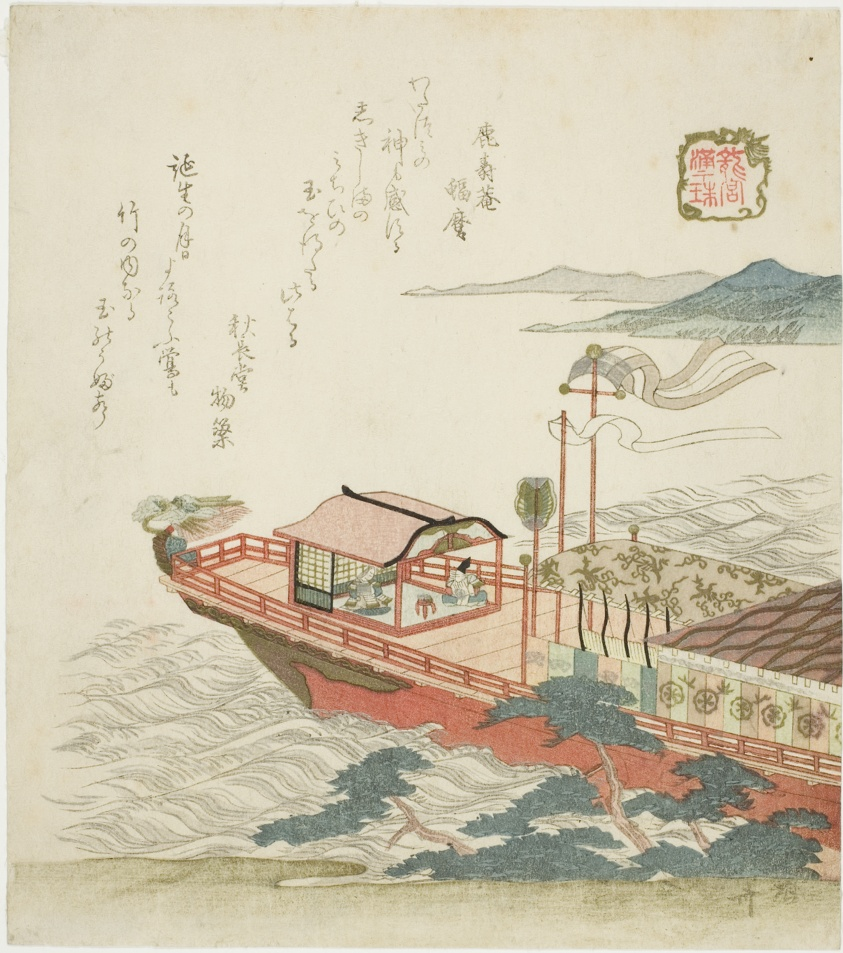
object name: Print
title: Jewel of the Full Tide (Manju), from the series "The Palace of the Dragon King (Ryugu)"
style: Japanese (culture or style)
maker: Ryuryukyo Shinsai (Japanese, c. 1764-1820)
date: 1820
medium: Color woodblock print; shikishiban, surimono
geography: Japan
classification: woodblock print; print; asian art